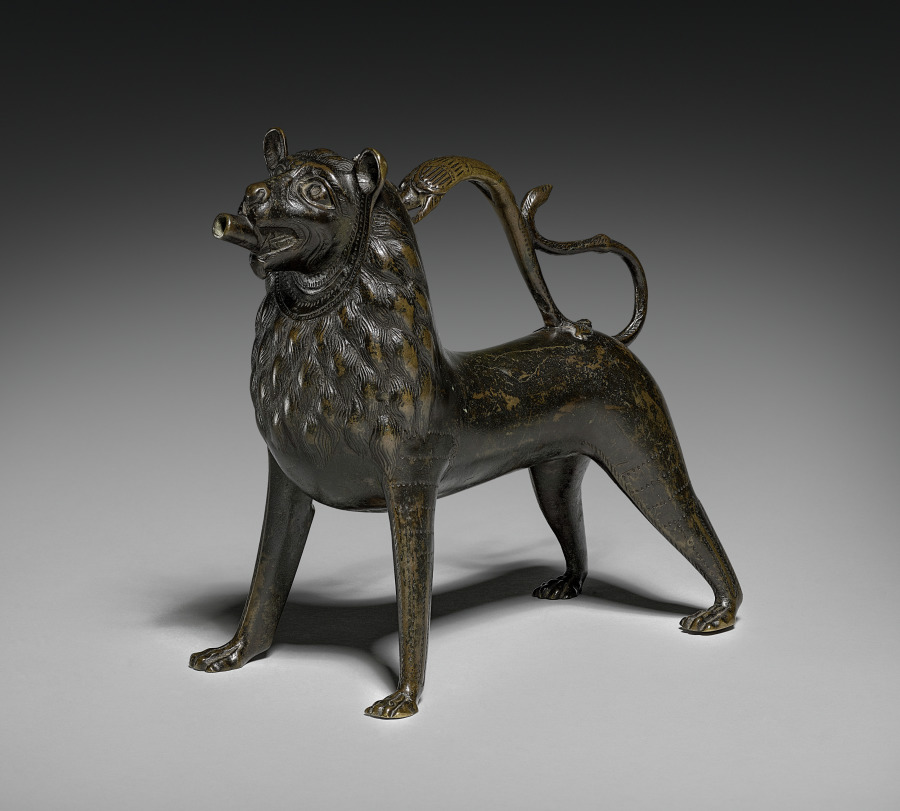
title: Lion Aquamanile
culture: Germany, Lower Saxony, Hildesheim, Gothic period, first half 13th century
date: 1200–1250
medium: bronze: cast, chased, and punched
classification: Sculpture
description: An aquamanile is a water vessel used for washing hands both at church altars and at the dinner tables of upper-class patrons. They often took the form of fantastic beasts such as dragons and unicorns or animals such as horses, birds, dogs, and lions, like this one.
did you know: The handle of this vessel is in the shape of a dragon with a long curving tail.